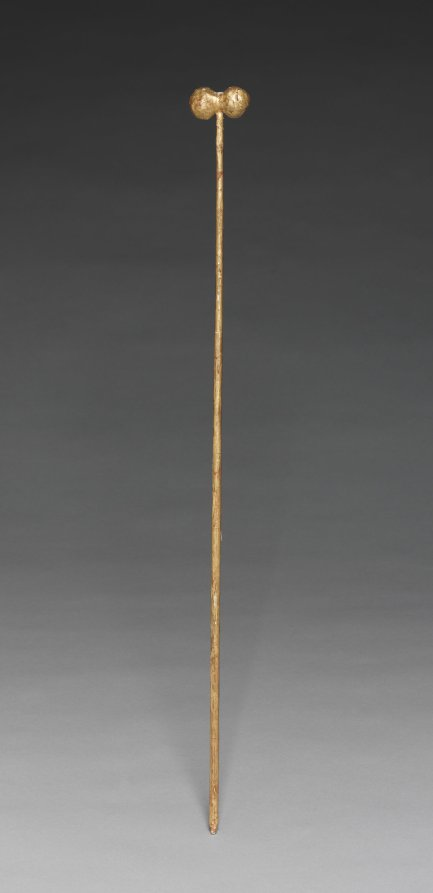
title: Altarpiece with Relics - Sponge, lower left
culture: Germany, Bavaria, 18th century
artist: Joseph Matthias Götz (German, 1696–1760)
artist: and Workshop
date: c. 1735–1740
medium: gilded wood, with relics in niches: gilded wood, mother-of-pearl, ebony, red silk, gold wire, seed pearls, rock crystal, pen and ink on paper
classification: Sculpture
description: Götz covers every surface in gold leaf, giving each part of the object equal importance, rather than simply framing a central picture. In this distinctively Central European approach, figural narrative is subordinate to the overall ensemble. Götz designed this object to rest on top of an altar, probably in front of a larger painted or sculpted decorative scheme. The work contains relics seen through the small windows on the perimeter. These small remains of holy figures demonstrate the persistence of a medieval Catholic tradition well into the 1700s.